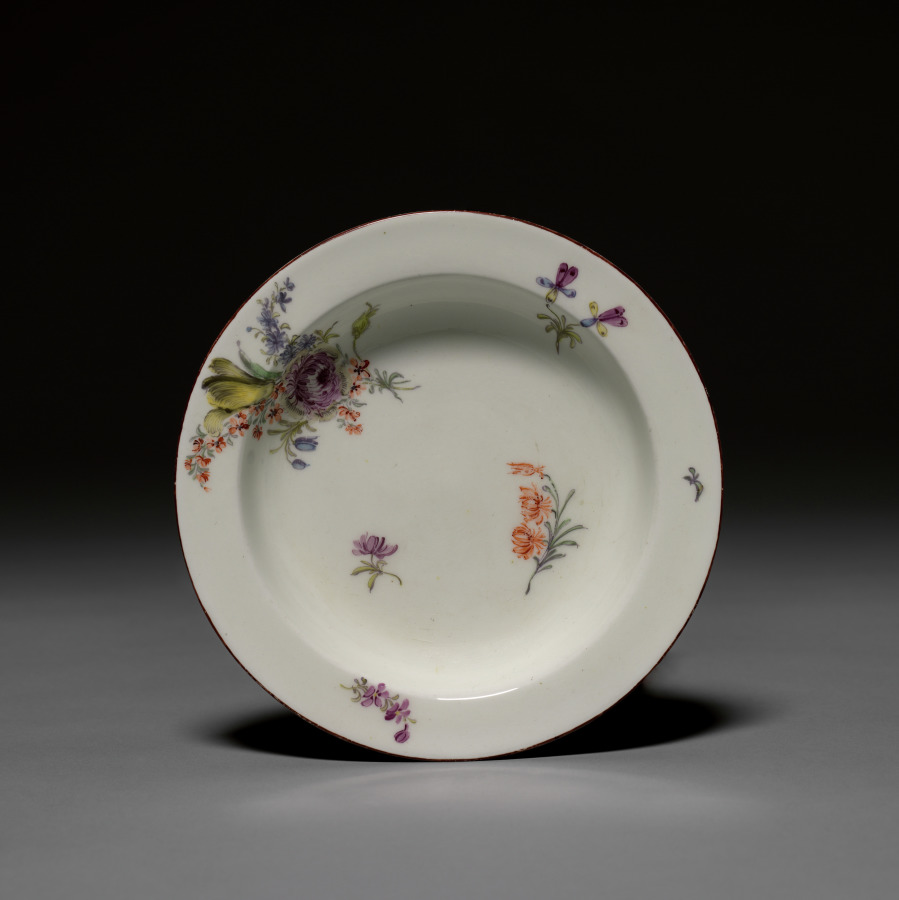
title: Dish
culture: England, Chelsea, 18th century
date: c. 1755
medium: soft-paste porcelain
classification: Ceramic